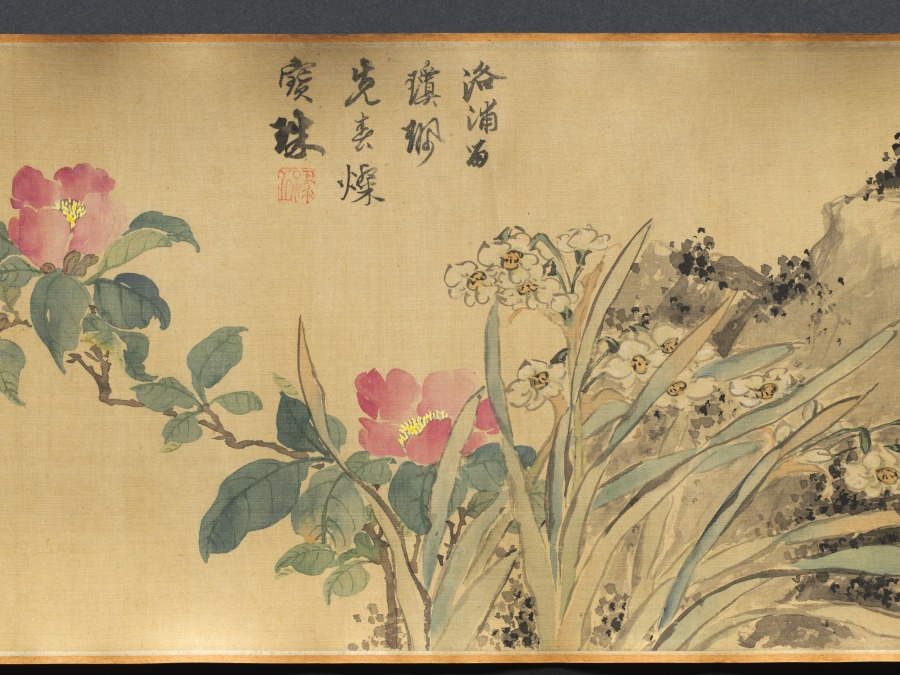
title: Flowers of Four Seasons, with Poems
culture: China, Ming dynasty (1368–1644)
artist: Wang Guxiang (Chinese, 1501–1568)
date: 1531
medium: handscroll; ink and light color on silk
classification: Painting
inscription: Artist's inscription, signature, and 15 seals. Ink Orchids. Sewn as pendants for the man of worth, swaying quiety, fragrance in the valley. [seal] Hsiao-chu ts'un Peony. Wiping his face, the young gentleman Ho [Ho Yen of Wei, Three Kingdoms] appears to have been powdered. His previous life was the perfume-stealing Han Shou [of Chin, 265–419 CE], the fragrance still lingers. [seal] Ts'un-wu chai. Flowering Crab Apple, New Bamboo. Shao-lin [Du Fu, 712–770] had to put down his brush. [Flowering Crab Apple]. Yü-k'o [Wen T'ung, d. 1079) in vain wrote poems about [Bamboo]. [seal] Yu-shih. Lotus Flowers. When she turns her head, half-hidden by a fan, and casts a glance, all the beautiful women become colorless. [seal] K'ang yüeh huai. Loquat. Ripeness in summer. [seal] Lu-chih. Pomegranate Flower. Whenever I remember you I will send my thoughts, but where have you gone--the [skirt] of pomegranate red? [seal] Wu-ho Sheng. Day Lily. Plant the day lily to forget sorrow. [seal] Yu-shih. Chrysanthemum. The untrammelled joy at the eastern fence. [seal] Lu-chih. Begonia. Comparing it to the beauties of Spring, and spreading them out as trimming for the stone steps. [seal] Yu-shih. Hibiscus. In recent years I have always enjoyed looking at flowers; instead of dark red I preferred pink ones. [seal] Jen-sheng i-lou. Narcissus, Camellia. The jade girdle left behind at Lo River. [Narcissus]. The precious pearls glitter before Spring. [Camellia]. [seal] Lu-chih. Heavenly Bamboo (Nandina domestica). A single branch in the wintry season. [seal] K'ang yüeh huai. Plum. Fragrant snow in the Lo-fou Mountains. [seal] Ts'un-wu chai. In the eleventh lunar month of the hsin-mao year of the Jiaqing era [1531], [I] imitated the boneless style of Yüan masters in sketching from life. Guxiang [seals] Yu-shih; Lu-chih. Translated by Wai-kam Ho/Lingyun Shih Liu (1980)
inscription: 2 colophons and 23 additional seals: 1 colophon dated 1632, and 2 seals of Li Jih-hua [Li Rihua] 李日華 (1565–1635); 1 colophon and 2 seals of Xiang Shengmo 項聖謨 (1597–1658); 3 seals of Liang Qingbiao 梁清標 (1620–1691); 6 seals of the Jiaqing 嘉慶 emperor (r. 1796–1820); 9 seals of Ch'eng Ch'i [Cheng Qi] 程琦 (1911–1988)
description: In this painting, flowers are loosely arranged by the seasons: narcissus and peony represent early spring; yellow loquat and lotus, summer; chrysanthemum, autumn; and the plum and evergreen bamboo, winter. The artist added to each flower a poetic line of calligraphy associating each plant with a historic or legendary figure. For example, the chrysanthemum, along with the line “The untrammeled joy at the eastern fence,” refers to the poet Tao Yuanming (died AD 427) who enjoyed chrysanthemums at the eastern fence in his garden. The scroll illustrates Wang Guxiang’s mastery of free brushwork, combining light monochrome ink with transparent colors. In his inscription, Wang says he used the “boneless” style without outlines as developed during the Yuan dynasty (1279–1368). Wang was a native of Changzhou, a city in southeast China known for its rich flora and fauna, and flower-and-bird painting tradition.